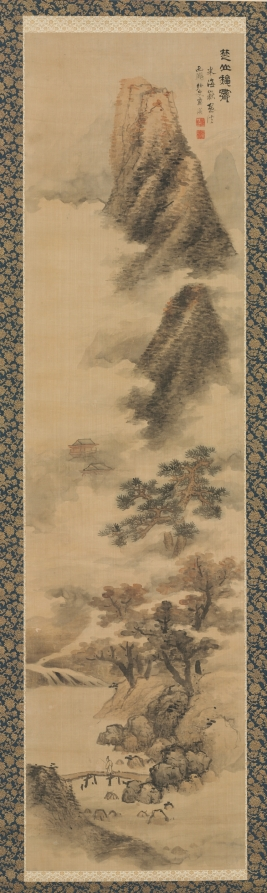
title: Clearing Autumn Mists in the Chu Mountains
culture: China, Ming dynasty (1368–1644)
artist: Lan Ying (Chinese, 1585–after 1664)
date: 1600s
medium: hanging scroll, ink and light color on silk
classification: Painting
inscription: Artist's inscription, signature, and 2 seals: Clearing Autumn Mists in the Chu Mountains, painted in the manner of Mi Haiyue [Mi Fu]. Xihu waishi, Lan Ying [seals] Lan Ying zhiyin; Shiwu toutuo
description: In his inscription Lan Yin states that he uses Mi Fu’s methods to depict this landscape. The ovoid "Mi" dots—Mi Fu’s brush idioms—are applied to give shape to the cloud-enveloped mountains and foreground tree grove for self expression. Engaging in the process of fang (imitation), he acquired the methods of various schools and masters to expand his technical range for creative transformations. Lan Yin developed his unique style and inspired major artists like Liu Du and Chen Hongshou.